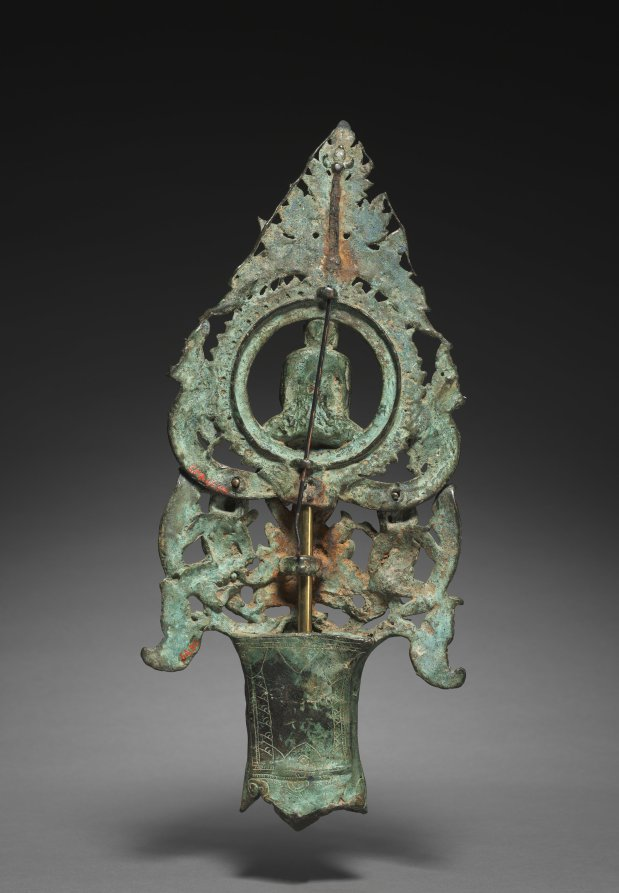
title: Portable icon of Shakyamuni Buddha in the Earth-touching gesture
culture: Cambodia, reign of Jayavarman 7th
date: late 1100s–early 1200s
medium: Bronze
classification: Sculpture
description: The Buddha sits surrounded by a circle of flaming jewels and full-blown lotus petals. Two rearing serpents emblematic of the glory of the Khmer Empire emerge from either side of his lotus pedestal. The Buddha’s right hand points down in the earth-touching gesture, and his left hand holds a round object, probably a special rice offering that indicates the Buddha’s power to ensure ongoing prosperity of the land. The branches of the pipal tree under which the Buddha reached enlightenment top the composition. Beneath his lotus pedestal, the earth goddess wrings the waters from her hair that wash away the army of Mara, the grimacing demons holding clubs and shields who flee to either side.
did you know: Bronze images such as this were used to transfer a sacred presence from one temple to another.